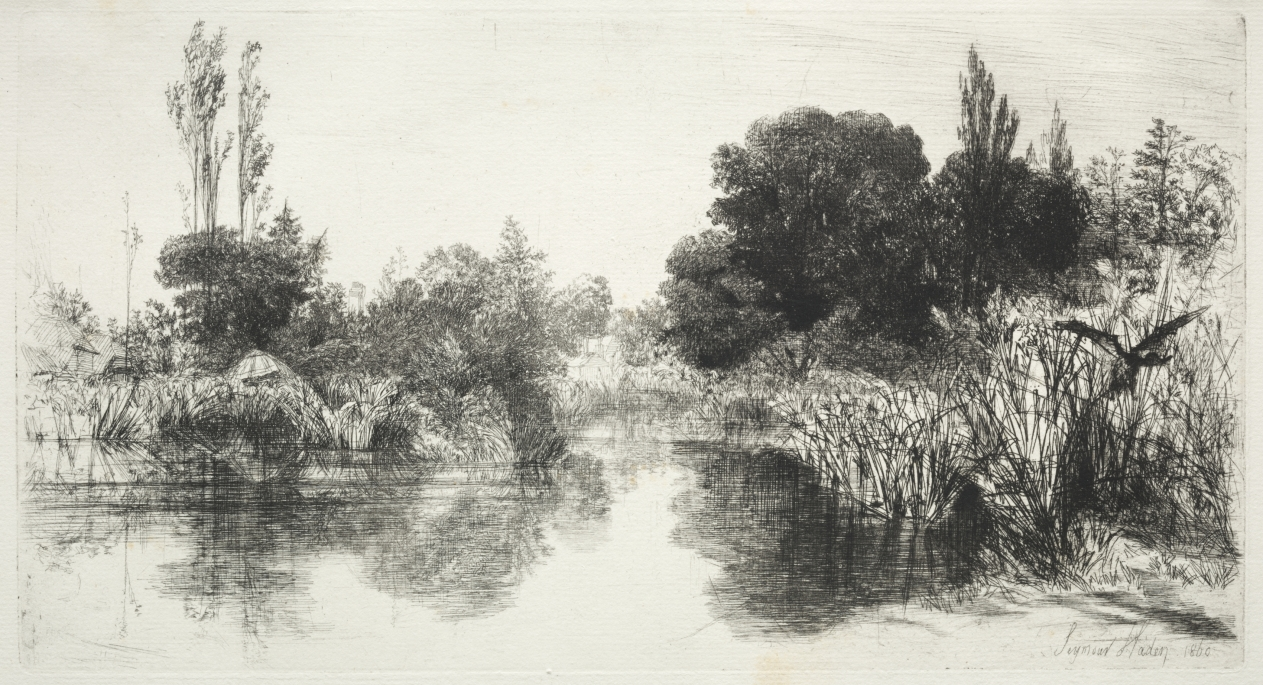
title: Share Mill Pond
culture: England, 19th century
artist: Francis Seymour Haden (British, 1818–1910)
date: 1860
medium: etching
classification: Print